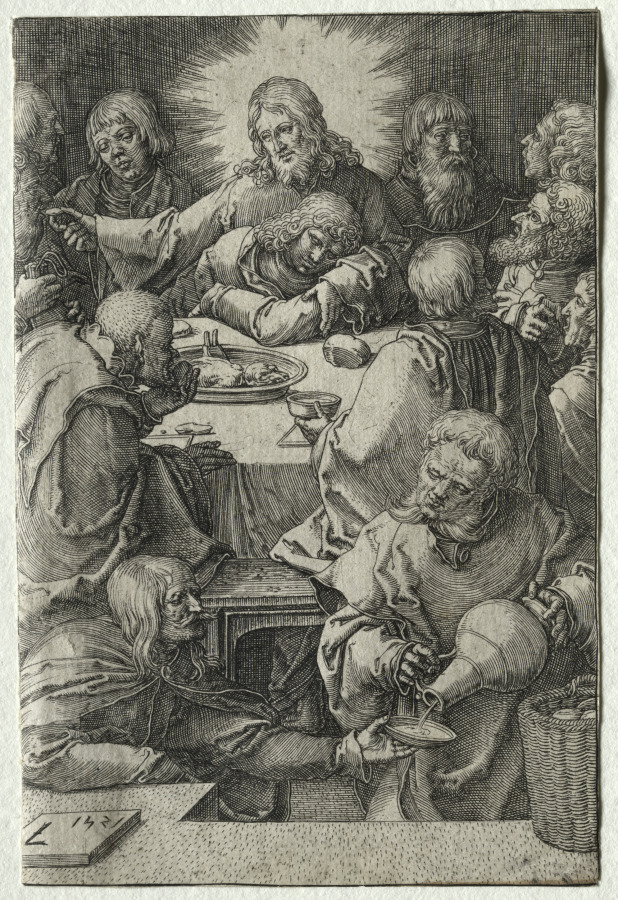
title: The Passion: The Last Supper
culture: Netherlands, 16th century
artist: Lucas van Leyden (Netherlandish, 1494–about 1533)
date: 1521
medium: engraving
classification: Print